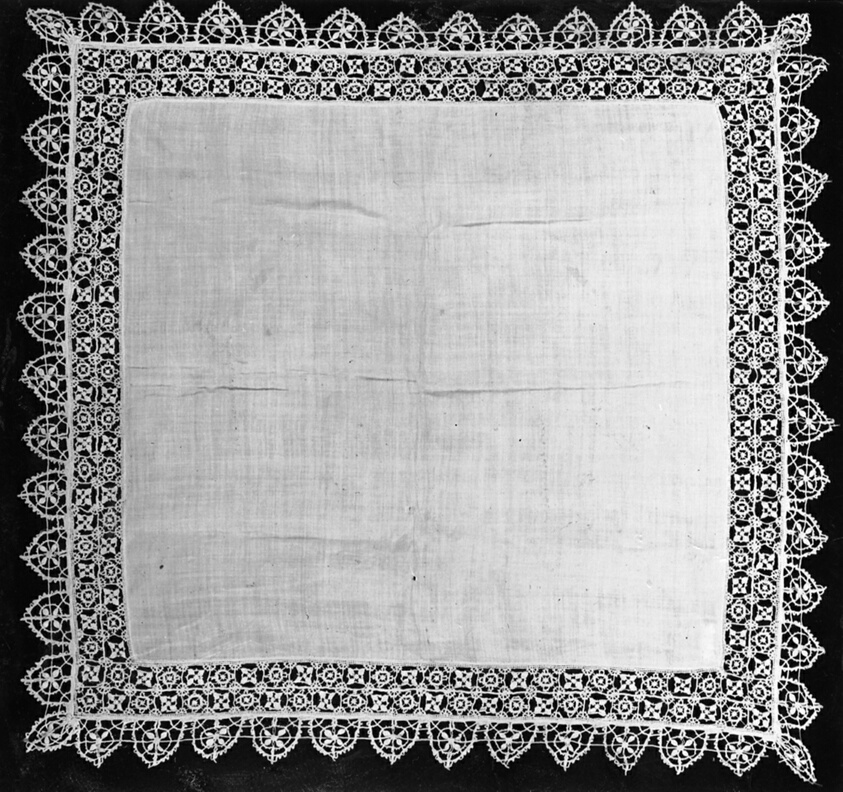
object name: Textile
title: Handkerchief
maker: Italy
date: 1601/50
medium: Linen, plain weave; edged with needle lace worked on a plain weave; cut and drawn work grid; Reticella pattern and bobbin straight lace points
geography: Italy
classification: textile; lace - mixed